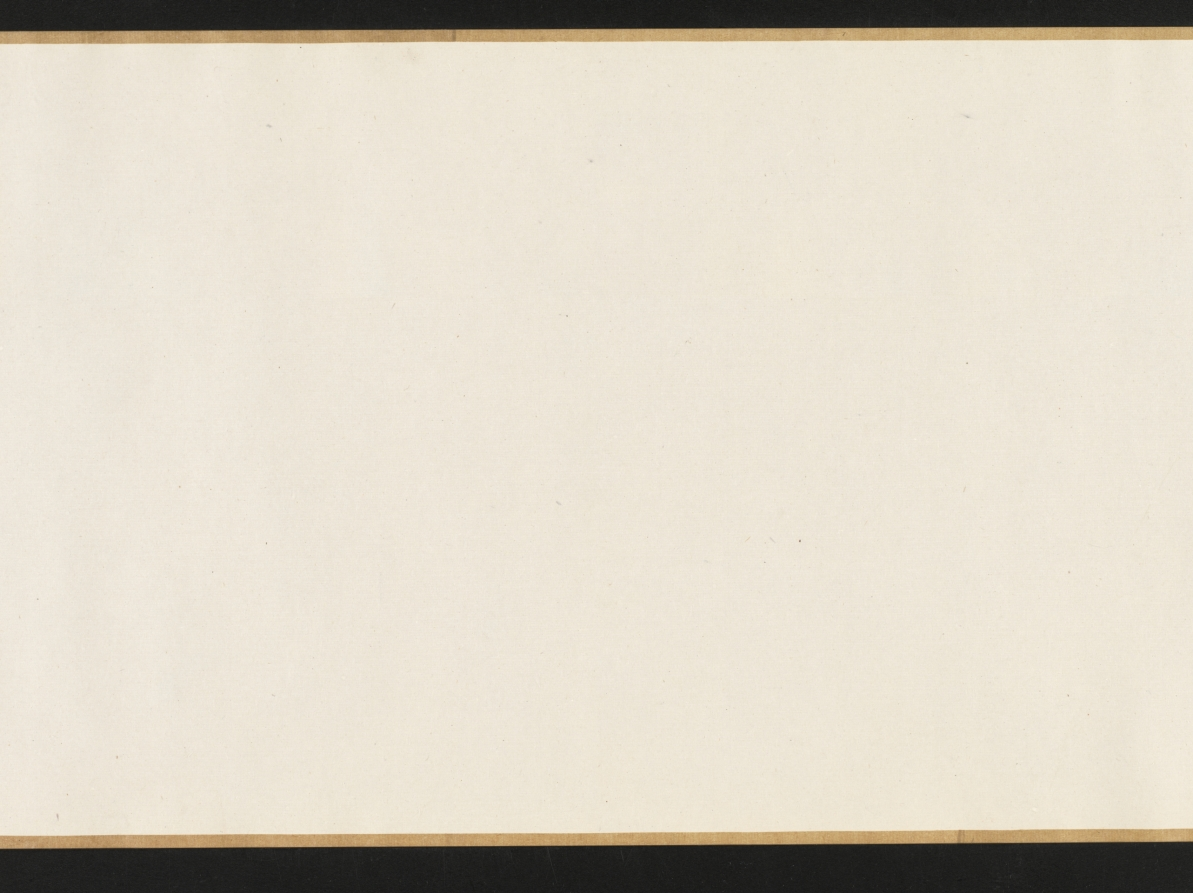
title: The Lantern Night Excursion of Zhong Kui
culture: China, Yuan dynasty (1271-1368)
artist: Yan Hui (Chinese, active 1270–1310)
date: late 1200s–early 1300s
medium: handscroll; ink and slight color on silk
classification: Painting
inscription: Artist's signature [and probable seal]: Yan Qiuyue 顏秋月 Title on frontispiece and 1 seal of Niu Shuyu 鈕樹玉 (1760–1827): Qiuyue mohuan 秋月墨幻 [Qiuyue's Ink Fantasy]. 31 additional seals: 2 of Yang Shiqi 楊士奇 (1365–1444); 2 of An Guo 安國 (1481–1534); 8 of Xiang Yuanbian 項元汴 (1525–1590); 2 of Geng Zhaozhong 耿昭忠 (1640–1686); 4 of Pu Tung 溥侗 (1870–1952); 7 of Tan Jing 譚敬 (1911–1991); 1 of Liu Ting-chih (20th c.); 5 unidentified.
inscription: An inscription by Zizhi Shanren 紫芝山人 [probably Jiang Hui 蔣惠], dated 1389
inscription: An inscription by Wu Kuan 吳寬 (1436–1504)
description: Here, the demon queller Zhong Kui leads a nightly procession of street entertainers with bare, muscular bodies and demonic faces. Some wear shabby clothes, and all perform stunts and tricks to astound and scare the viewer. In fact, a New Year custom in cities of southeast China had the poor, disguised as demons, process through the streets and play their tricks to clear households of evil spirits and welcome the spring. From right to left, a demonic figure leads the procession and beats a drum; another lifts a large rock; one stands on his hands trying to drink; one balances a jar on his elbow; three hold and wield weapons; one carries a folded chair covered by a cow’s skin; another holds Zhong Kui’s qin (zither), books, brush, and inkstone. At the end of the scroll, two figures offer a cup and bottle of wine to Zhong Kui, who lifts his hand in command.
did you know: Zhong Kui was an ancient ghostbuster.